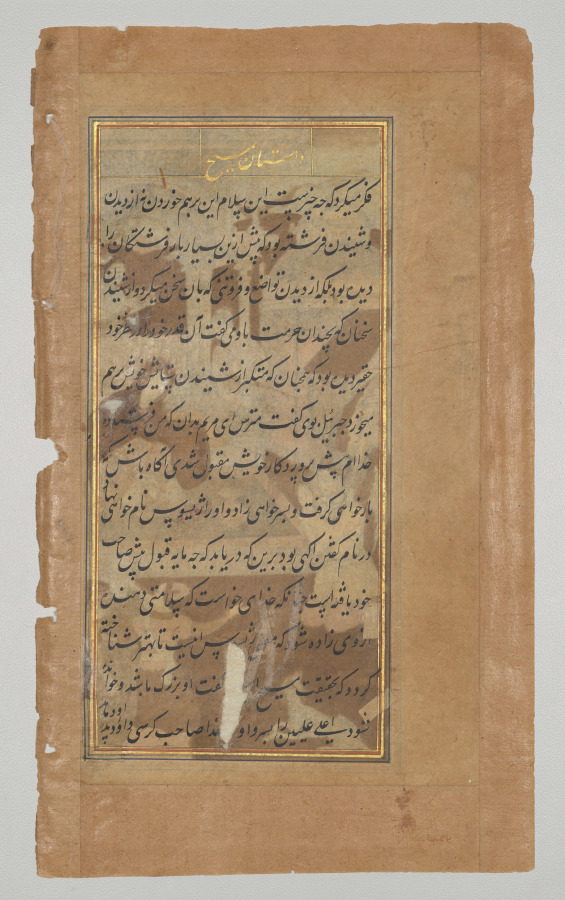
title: Text, folio 15 (verso), from a Mirror of Holiness (Mir’at al-quds) of Father Jerome Xavier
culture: Mughal India, Allahabad, made for Prince Salim (1569–1627)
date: 1602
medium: Ink and gold on paper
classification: Manuscript